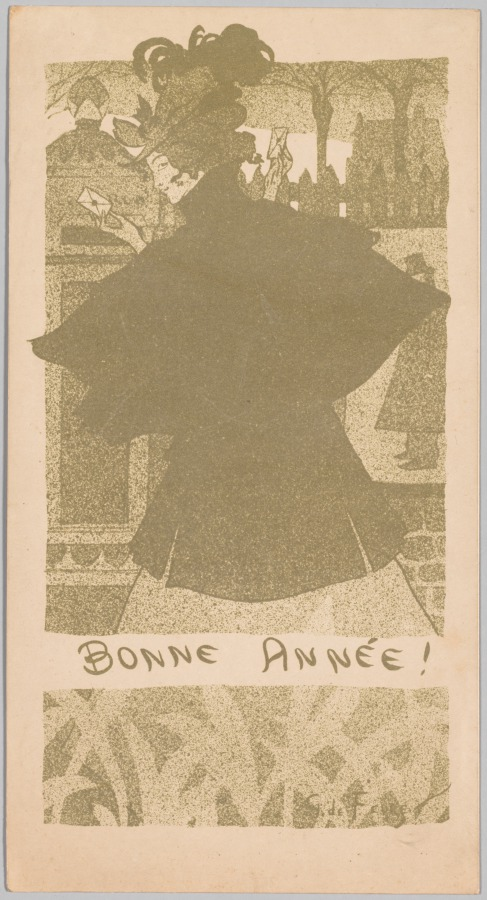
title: New Year’s Card (Bonne Annee!)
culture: France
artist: Georges de Feure (French, 1868–1943)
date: 1912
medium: color lithograph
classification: Print